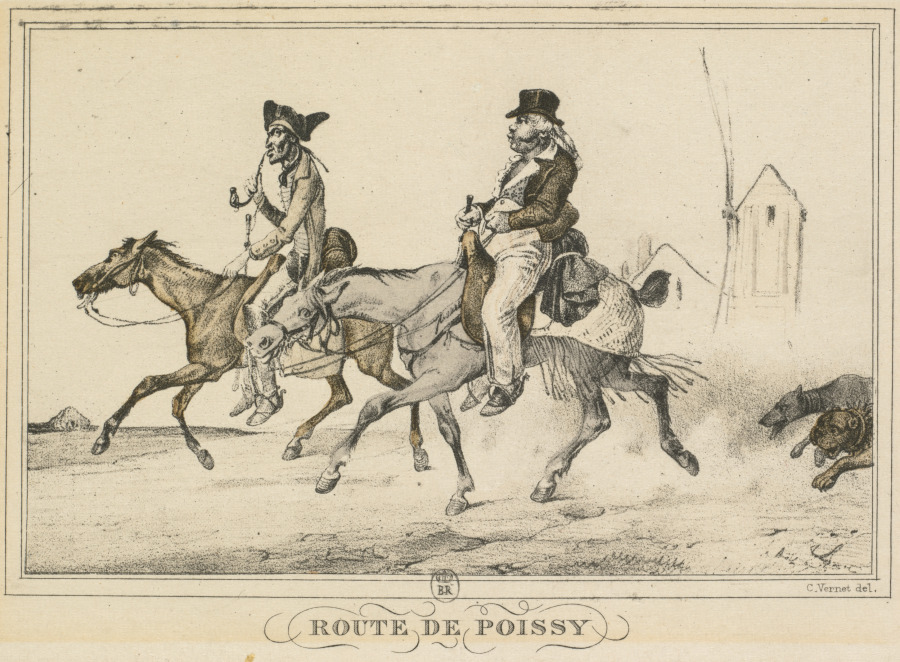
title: Scenes of Daily Life, Roads and Paths: Road to Poissy (Scènes de la vie quotidienne, Routes et Chemins: Route de Poissy)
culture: France, 19th century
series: Route de Poissy, Route de St. Cloud, Route de Poste, Route du Marche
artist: Carle Vernet (French, 1758–1836)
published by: Published by Bance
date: 1816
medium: lithograph gravure en couleurs a l'aquantinte par Debucourt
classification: Print